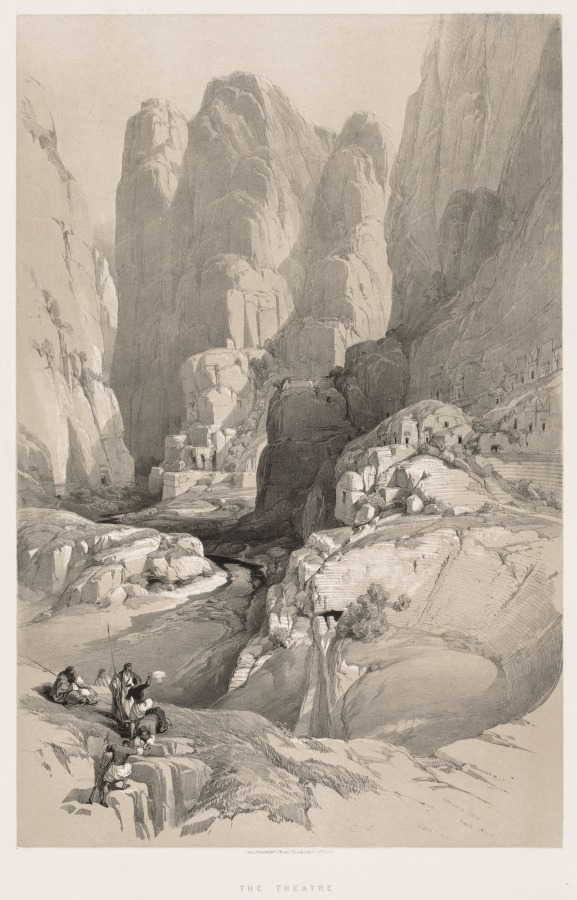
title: The Holy Land, Syria, Idumea, Arabia, Egypt & Nubia (Vol. III): Entrance to Petra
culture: England, 19th century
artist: Louis Haghe (British, 1806–1885)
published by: F. G. Moon (British, 1797–1871)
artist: after David Roberts (Scottish, 1796–1864)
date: 1842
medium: lithograph with black and beige tint stone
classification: Print